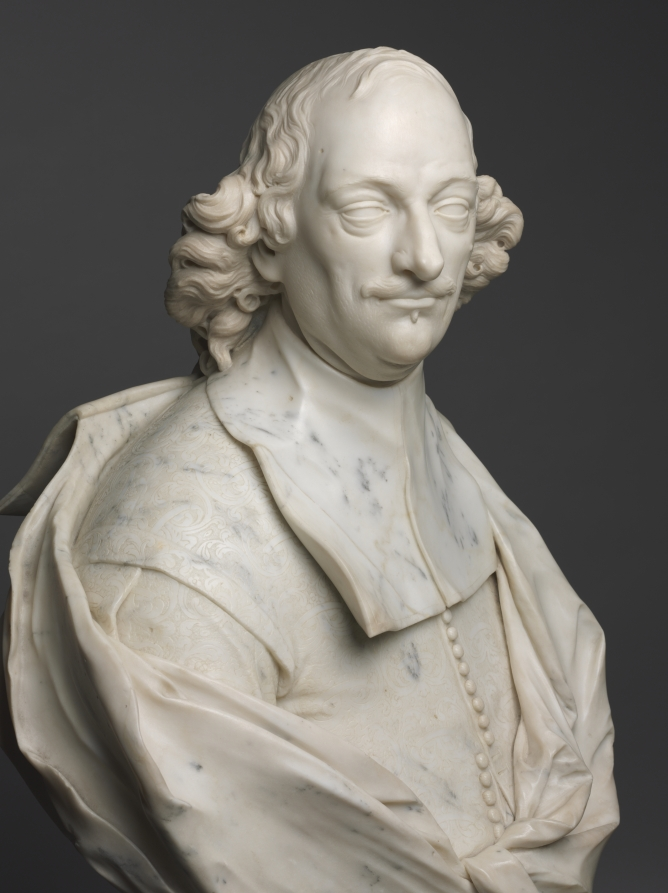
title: Portrait of Fabrizio Naro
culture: Italy, Rome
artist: Domenico Guidi (Italian, 1625–1701)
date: c. 1680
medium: marble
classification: Sculpture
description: This figure’s individualized facial expression, dynamic turn of the head and animated drapery are all characteristic of 17th-century Roman portrait sculpture. Guidi, a pupil of Alessandro Algardi, juxtaposed broad swaths of drapery and deeply drilled and carved hair with delicate surface detail, visible here in the patterning of the jacket and the faint suggestion of a beard. Based on a comparison with a later portrait on the family tomb in the church of Santa Maria sopra Minerva, Rome, the sitter has been identified as Fabrizio Naro (d. 1697), marquis of Mompei.